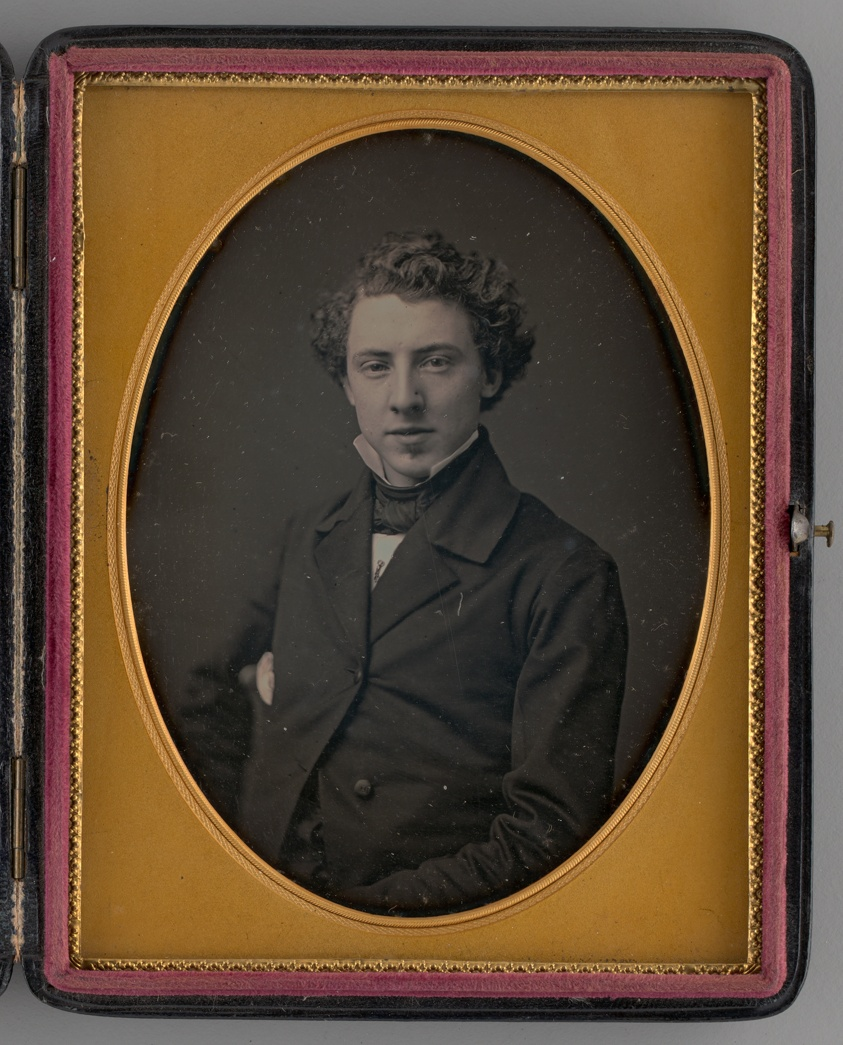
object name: Photograph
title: Untitled (Portrait of Man)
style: 19th century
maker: Boston School (American, 19th century)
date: 1858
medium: Daguerreotype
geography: United States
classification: portrait; photograph; photographic process; photography; portrait; daguerreotype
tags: lundberg collection, portraits, portraits: male subject, Male, photography, portrait